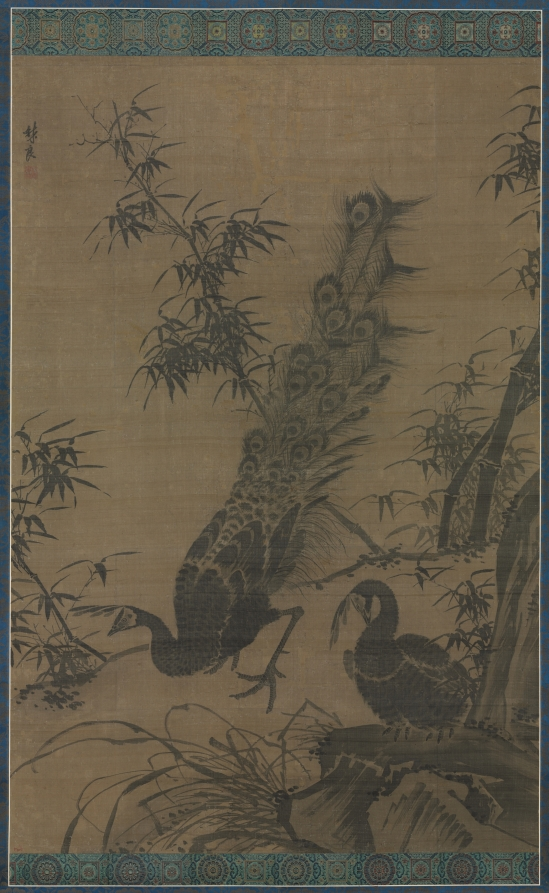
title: A Pair of Peafowl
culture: China, Ming dynasty (1368–1644)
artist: Lin Liang (Chinese, 1416–1480)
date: late 1400s-early 1500s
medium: hanging scroll, ink on silk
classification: Painting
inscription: 林良. [印] 以善圖書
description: The peacock, identified by the flamboyant tail, is paired with a female peahen to its right. In lowering her head, the hen seems to show respect to the male peacock. With his articulate brushstrokes and strong contrasting tones, Lin Liang’s representation in black ink appears as vivid as Yin Hong’s colorful peacock (1974.31). The painter skillfully uses wet and dry ink as well as broad and thin washes to represent the plumage of the bird. The surface of the rocks, depicted in powerful sweeping strokes, recalls the landscape painting style of the Zhe School, which specialized in expressive brushwork.